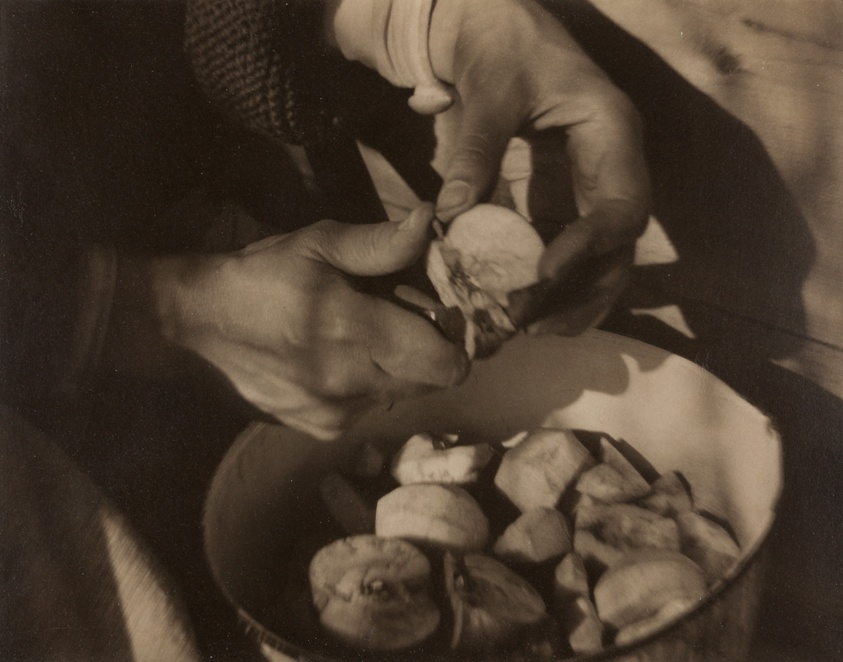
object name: Photograph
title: Georgia O'Keeffe—Hands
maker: Alfred Stieglitz (American, 1864–1946)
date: 1920/22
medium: Palladium print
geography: United States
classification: palladium print; photographic process; photography; photograph